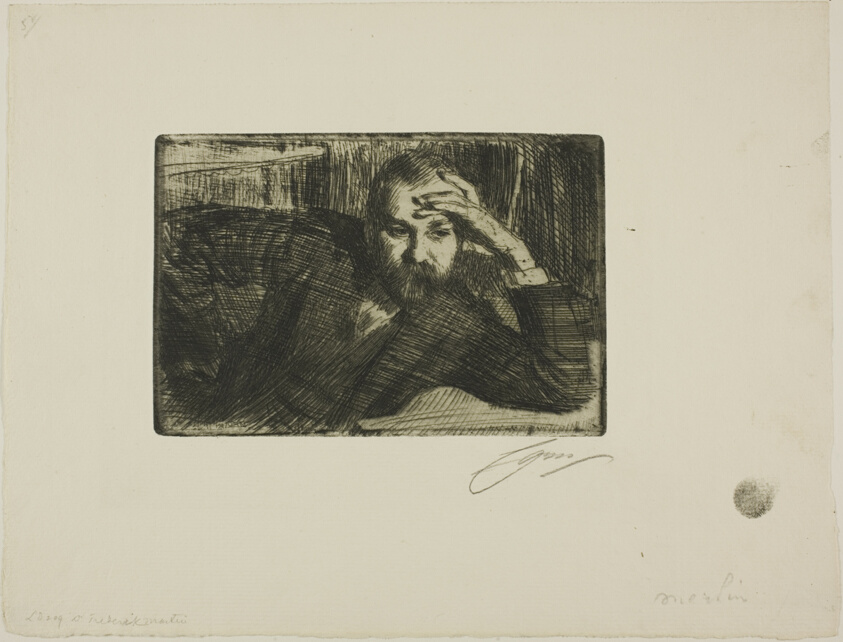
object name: Print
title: Fredrik Martin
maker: Anders Zorn (Swedish, 1860-1920)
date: 1907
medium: Etching on ivory laid paper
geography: Sweden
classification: etching; print; prints and drawing